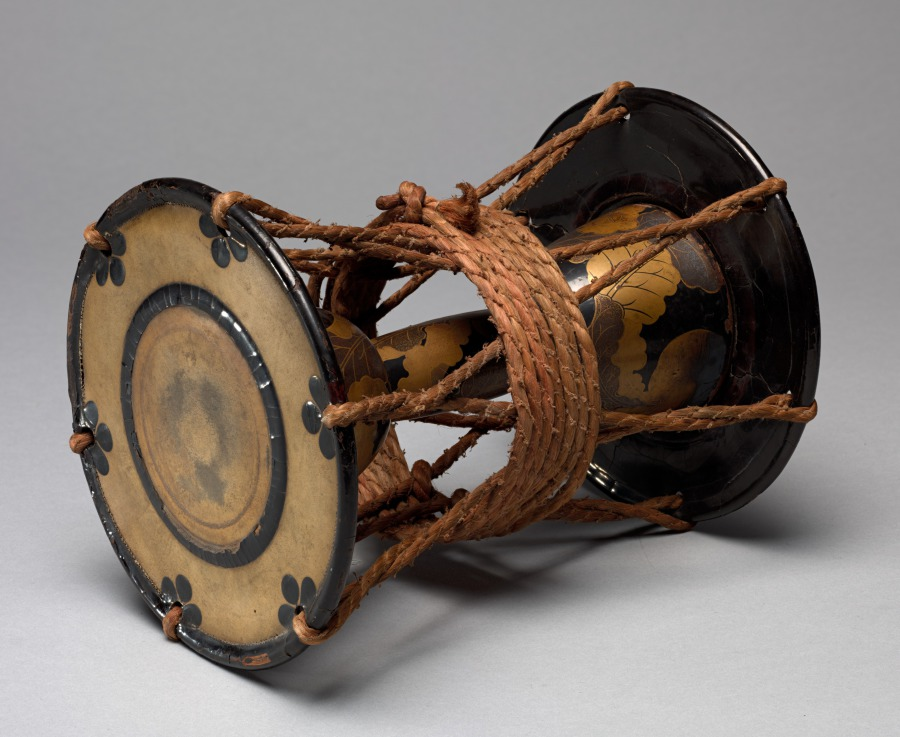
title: Tsuzumi Drum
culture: Japan, Edo period (1615–1868) to Meiji period (1868–1912)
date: 1800s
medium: Wood with lacquer and sprinkled gold powder (maki-e), hide, iron, and cord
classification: Musical Instrument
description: Tsuzumi hand drums were used as musical accompaniment for formal theatrical productions such as Noh, but also in traditional folk music. Small tsuzumi like this one are set against one shoulder, and held in place with one hand, while the other hand beats the heads. The sound is adjusted by regulating the humidity of the hide with one’s breath or spittle.